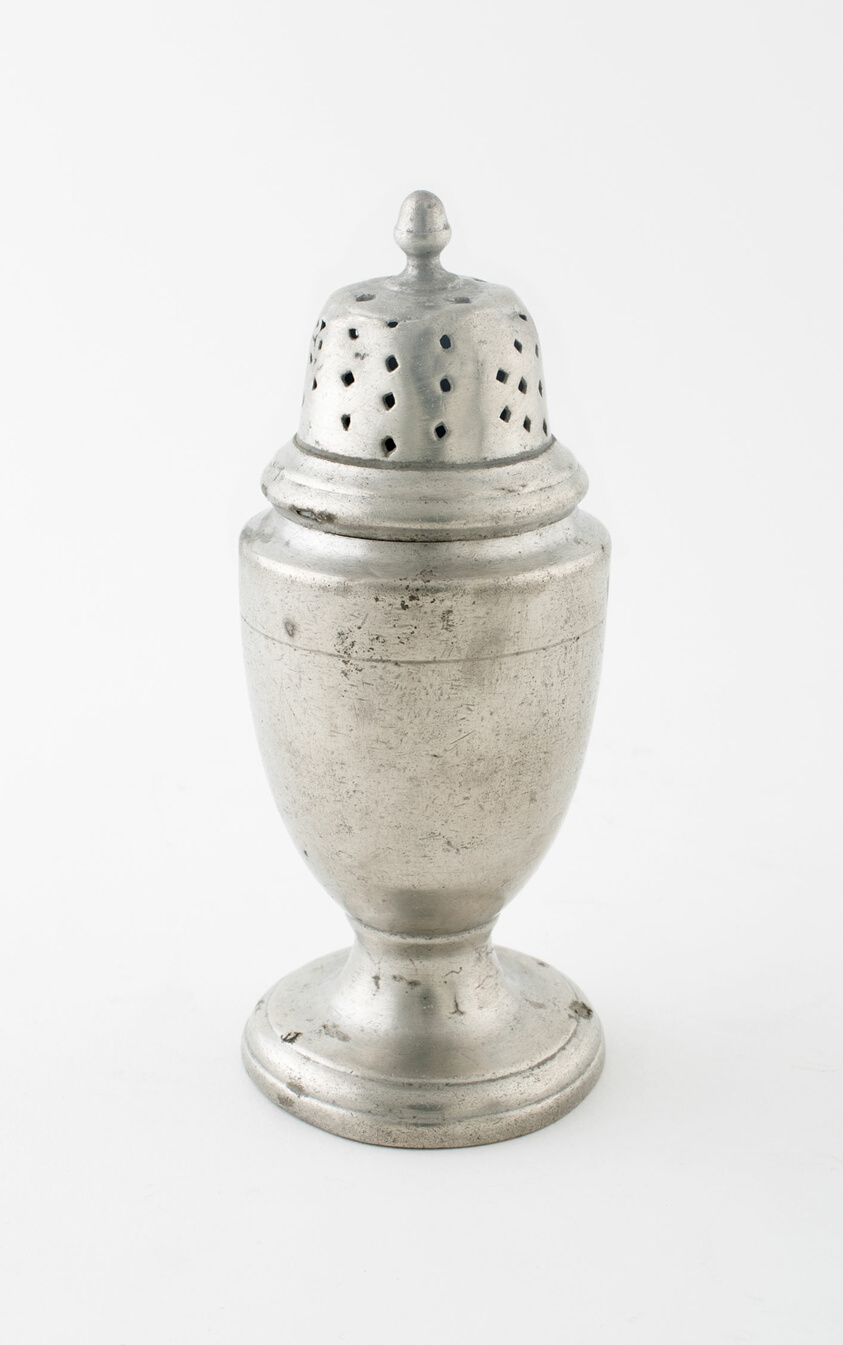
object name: Metalwork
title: Pepper Shaker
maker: Possibly Netherlands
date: Late 18th century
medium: Pewter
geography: Netherlands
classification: pewter; metalwork; european decorative arts